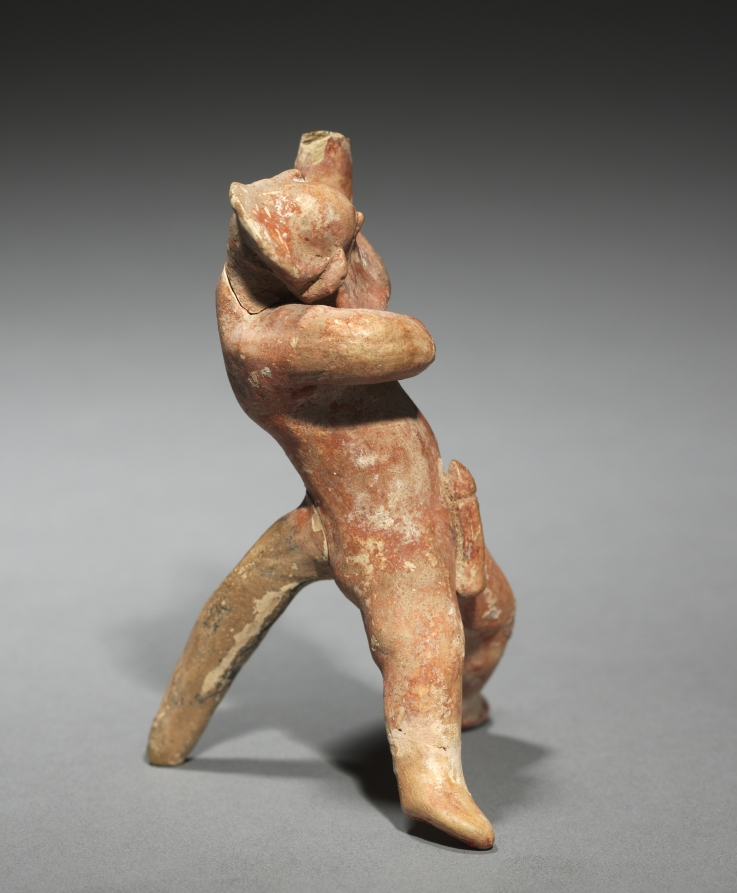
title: Dancing Satyr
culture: Greece, Boeotia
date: 500–475 BCE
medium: painted terracotta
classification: Sculpture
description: Part man and part beast, satyrs were mythical woodland creatures. In art, they were depicted with the ears and tail of a goat or horse, sometimes with hooves, and in a high state of sexual arousal. Satyrs often accompanied Dionysus, the god of wine, in his drinking bouts and other escapades. These three probably once decorated the rim of a large punch-bowl–shaped vessel for serving wine.